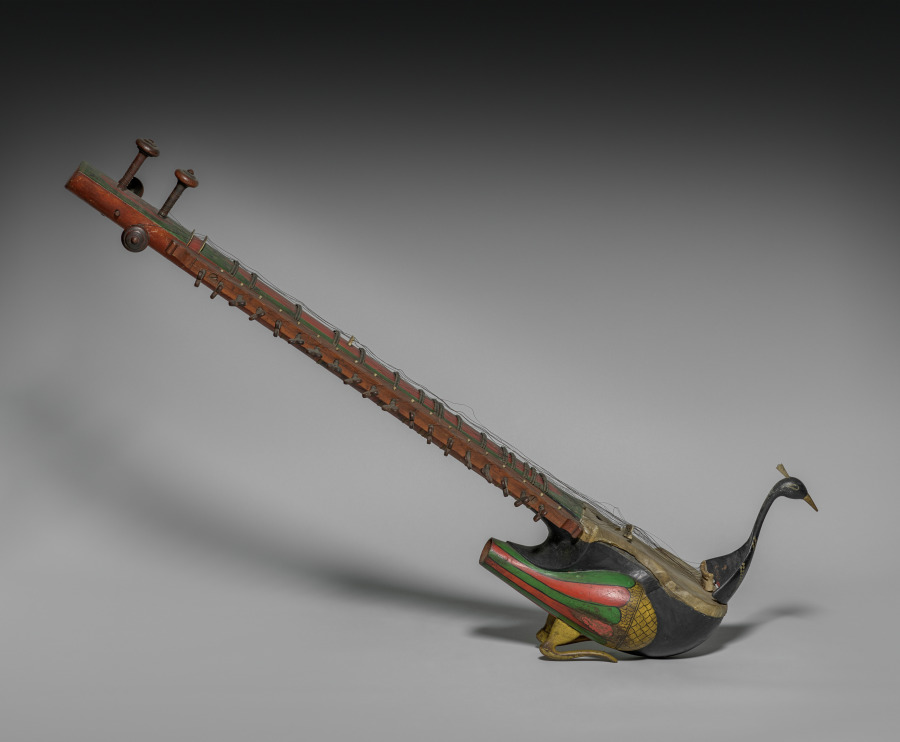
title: Taus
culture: India, Punjab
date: c. 1800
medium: Polychromed wood, parchment, bone or ivory, gut, and metal strings; frets: bronze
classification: Musical Instrument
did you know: The taus was designed by a Sikh Guru to combine the sounds of string instruments and the plaintive cry of the peacock.